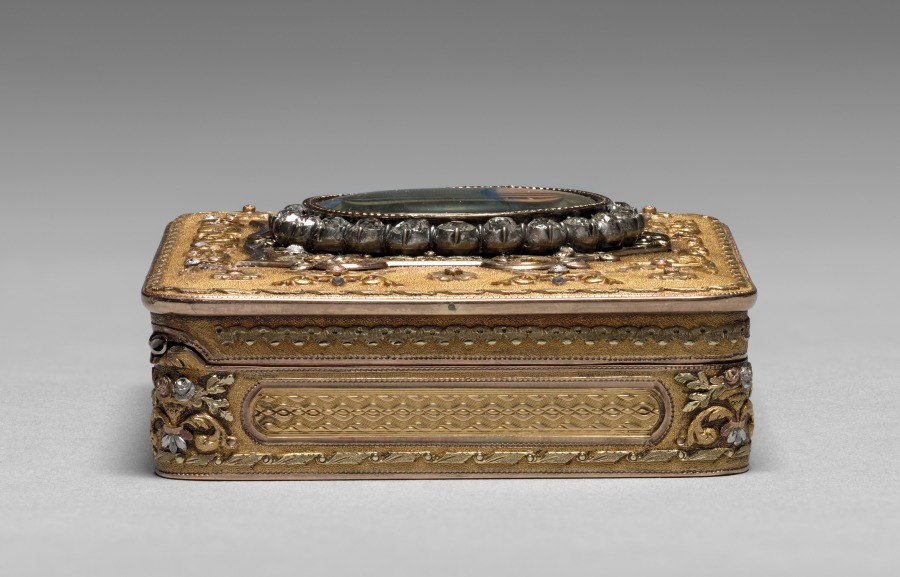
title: Portrait of a Man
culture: Switzerland, Neufchatel, mid-19th century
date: mid 1800s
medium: watercolor on ivory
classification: Miscellaneous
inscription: signed: "B."